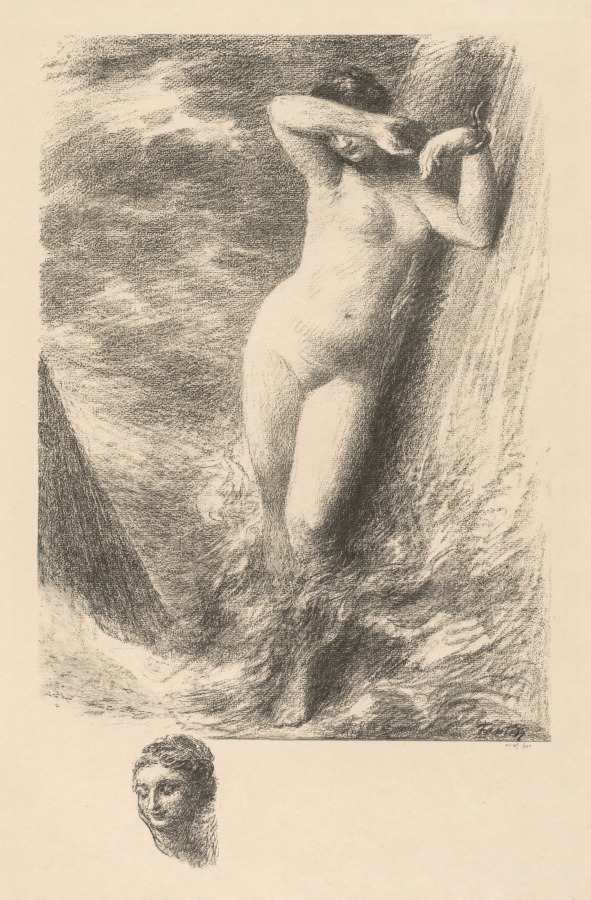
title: Andromeda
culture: France, early 20th Century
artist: Henri Fantin-Latour (French, 1836–1904)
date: 1901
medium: lithograph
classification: Print